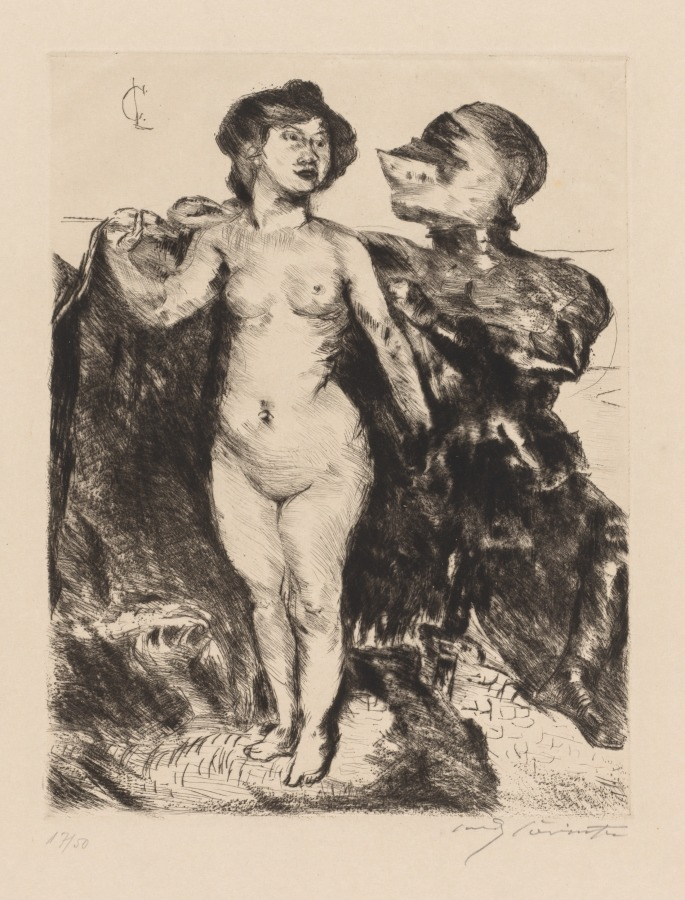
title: Perseus and Andromeda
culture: Germany, 20th century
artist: Lovis Corinth (German, 1858–1925)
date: 1920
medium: drypoint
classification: Print